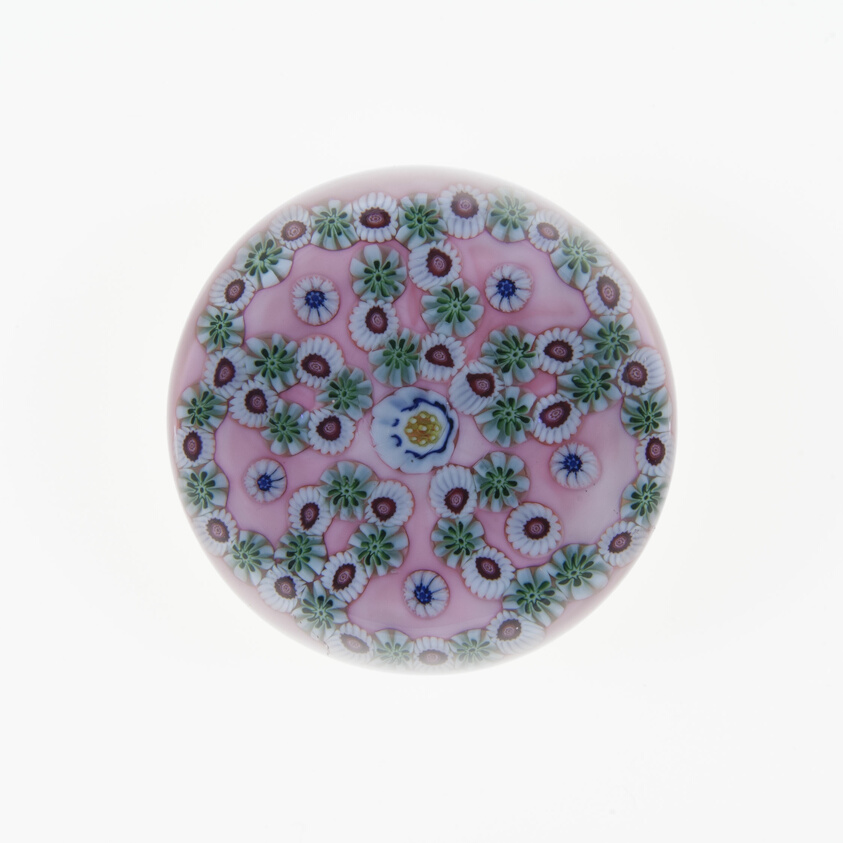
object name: Glass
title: Paperweight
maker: Clichy Glassworks (Cristalleries de Clichy); Clichy, France, 1837-1885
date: 19th century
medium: Glass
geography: Clichy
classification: paperweight; millefiori; european decorative arts; glass